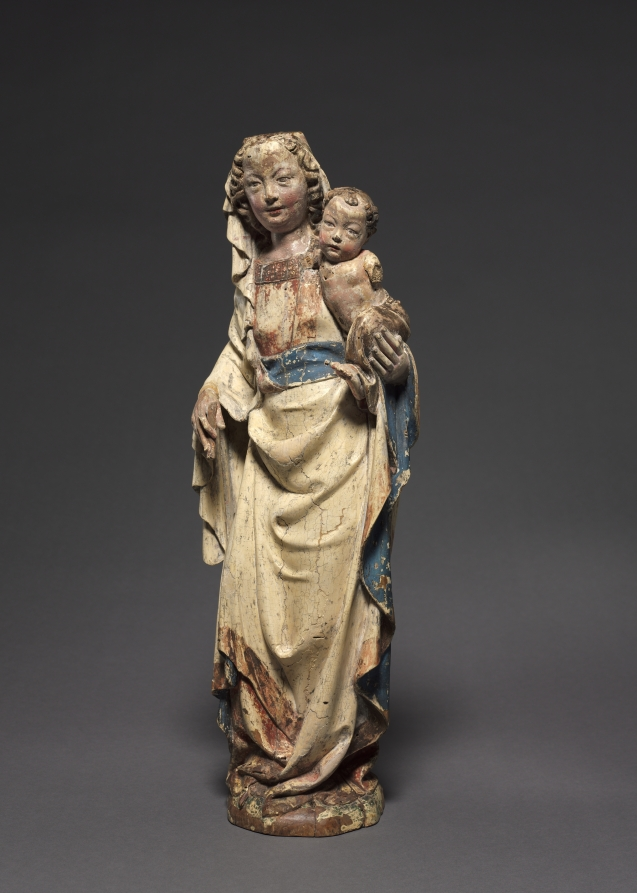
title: Virgin and Child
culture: Austria, Diocese of Passau, 14th century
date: c. 1370–1380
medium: painted lindenwood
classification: Sculpture